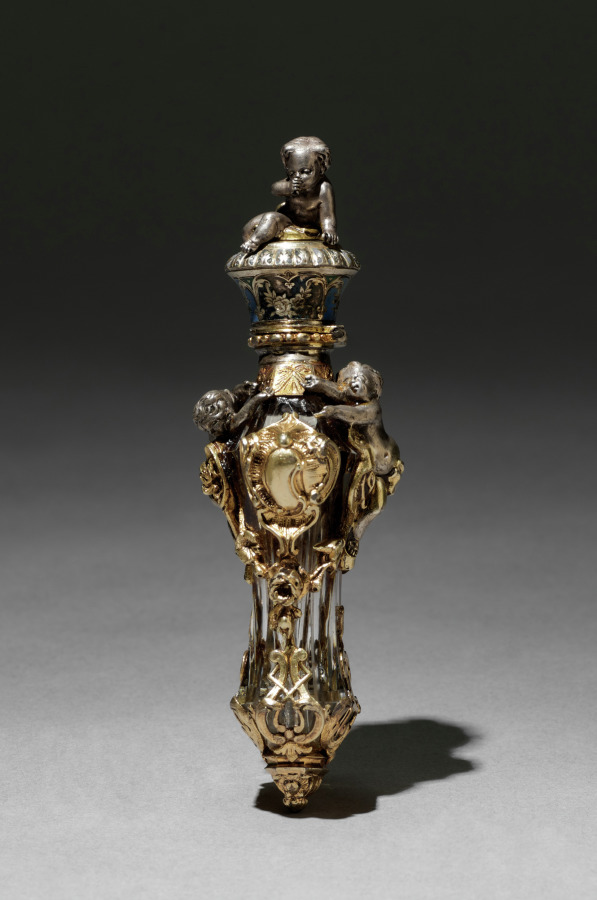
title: Scent Bottle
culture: France, 19th century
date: 1850–1870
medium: glass with enameled silver mounts, partially gilt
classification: Miscellaneous